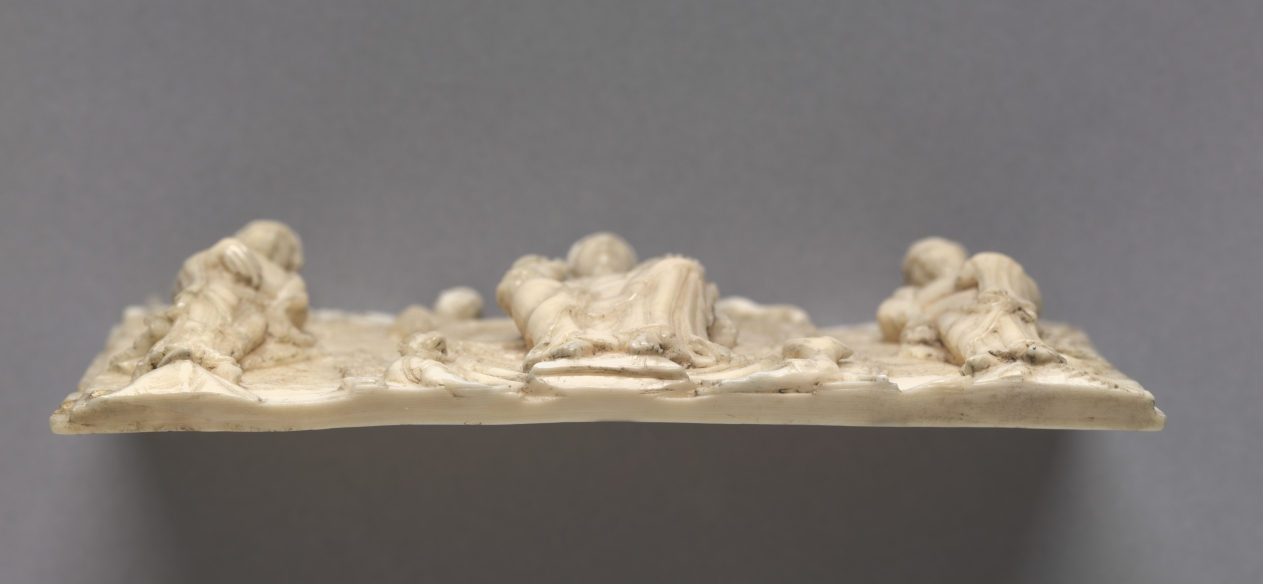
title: Plaque from a Portable Altar Showing Christ and the Apostles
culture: Germany, Lower Rhine Valley, Romanesque period, 11th century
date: 1050–1100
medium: walrus ivory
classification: Ivory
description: This intricately carved ivory panel once decorated the side of a portable altar. One of three plaques, it depicts Christ in Majesty and his apostles and were the first major acquisition of William M. Milliken, the museum's first curator of decorative arts and later director (1930–1958). As Milliken later recalled, the pieces "were immensely intriguing, monumental in scale, even if tiny in size, the Christ in the mandorla could have been enlarged and would have graced the tympanum of a great cathedral."